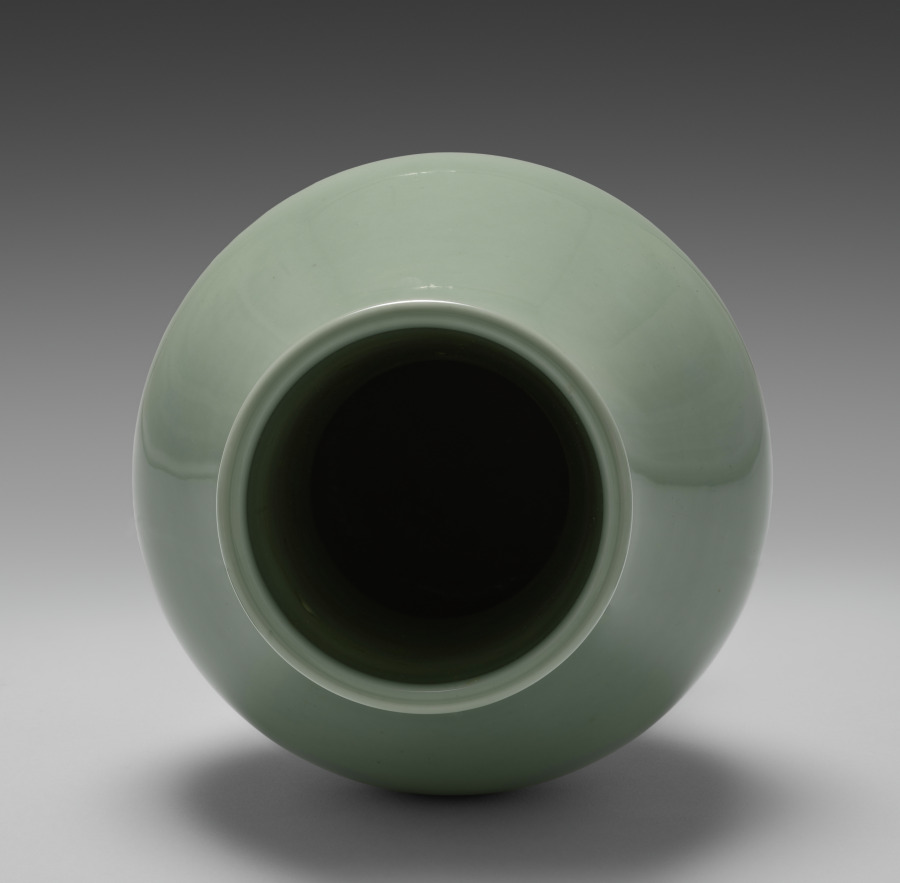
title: Flower Vase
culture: Japan, Meiji period (1868–1912)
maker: Seifū Yohei III (Japanese, 1851–1914)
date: 1912–14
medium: Porecelain with green glaze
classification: Ceramic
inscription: The vase's box lid identifies the vase as hisokuyō (C. mise yao 秘色窯), or “mysterious color ware,” style.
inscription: 清風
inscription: 清風制之 【印】帝室技芸員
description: This flower vase has a tall, slightly flared foot and bulbous body with a slimmer neck. It is completely undecorated but for the hisoku, or “mysterious color,” glaze. Its box lid has a red seal with a flower on it, a rather unusual feature also seen on the box for the green-glazed water container that belonged to the Hosokawa family (see CMA 2022.197).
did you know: The vase's box lid identifies the glaze as hisoku 秘色 or “mysterious color.”